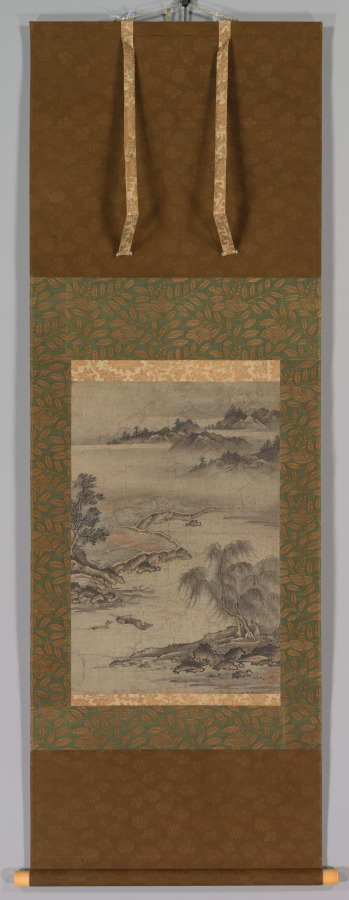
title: Farming and Herding Buffalo in Summer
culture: Japan, Muromachi period (1392–1573) to Momoyama period (1573–1615)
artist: Kano Hideyori (Japanese, active mid- to late 1500s)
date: mid- to late 1500s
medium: hanging scroll; ink and light color on paper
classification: Painting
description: Hideyori is most famous as the painter of a very early pair of genre screen paintings depicting people enjoying autumn foliage at a shrine-temple complex in Mount Takao near Kyoto. In this scene, people are hard at work farming their fields and herding water buffalo in summer. Such scenes were often associated with promoting the ideal of a prosperous realm, and also with the activities of the 12 months. Historical sources are divided on the biography of painter Kano Hideyori, but many scholars now believe he was the second son of Kano Motonobu, head of the Kyoto-based Kano family atelier.